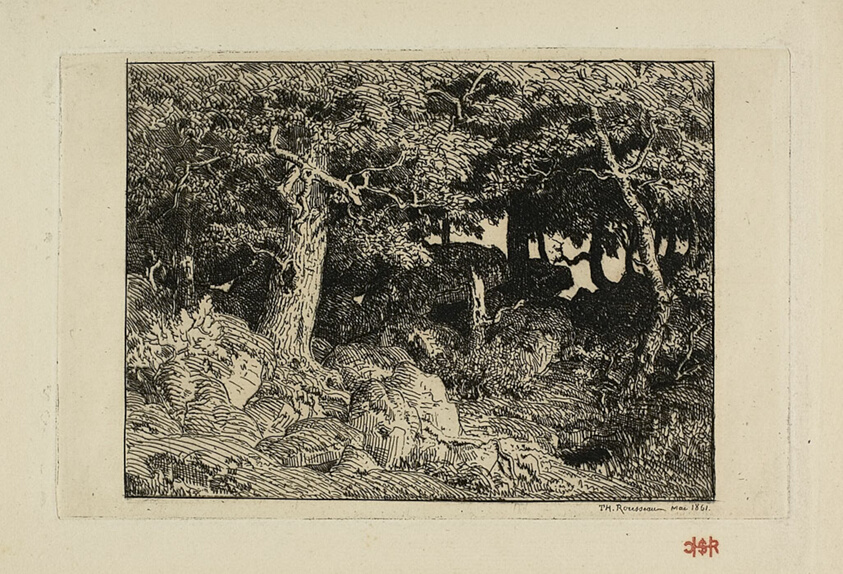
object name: Print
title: Rock Oaks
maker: Théodore Rousseau (French, 1812-1867); printed by Auguste Delâtre (French, 1822-1907)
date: 1861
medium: Etching on cream laid paper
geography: France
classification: etching; print; prints and drawing